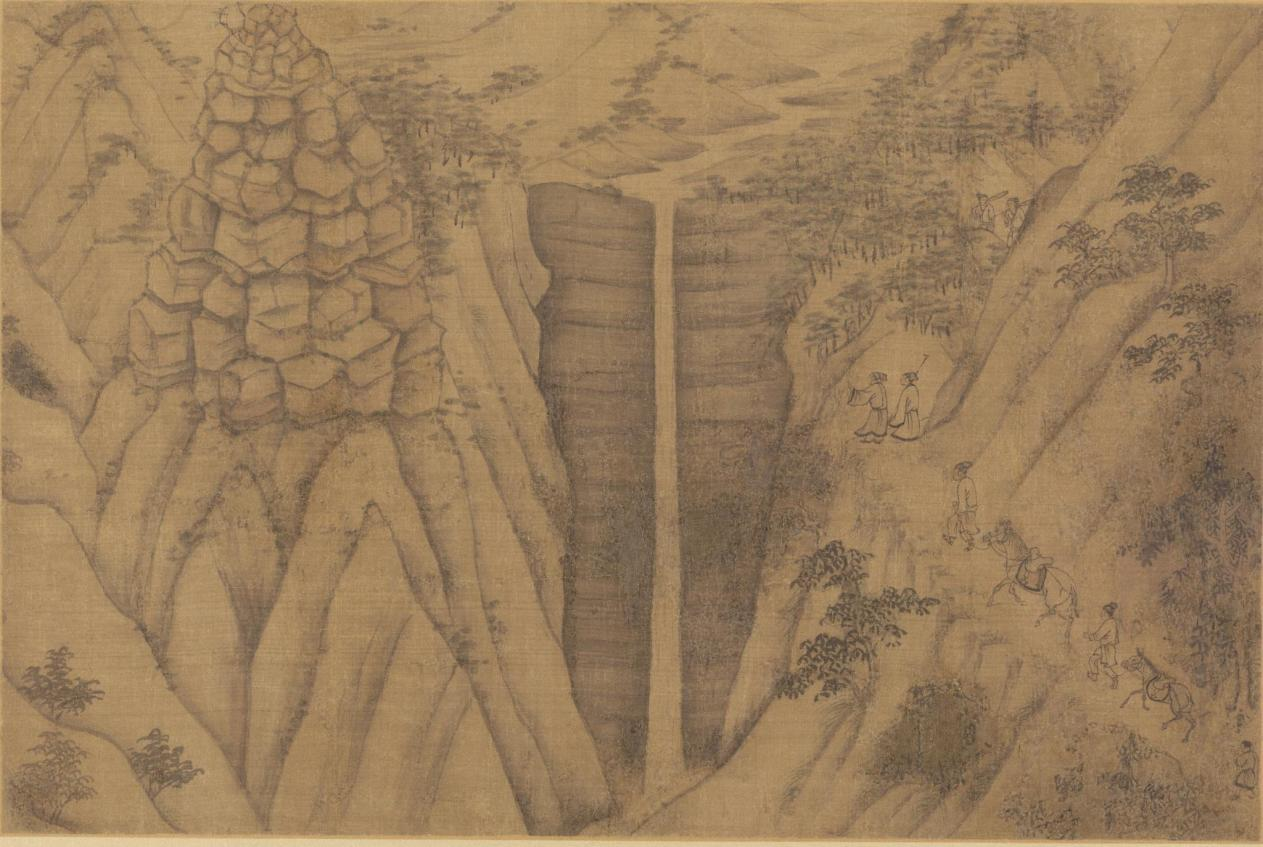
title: Dwelling in the Longmian ("Sleeping Dragon") Mountains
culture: China, Song dynasty (960-1279) - Yuan dynasty (1271-1368)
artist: follower of Li Gonglin (Chinese, c. 1049–1106)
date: 1100s-1200s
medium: handscroll mounted as an album leaf; ink and color on silk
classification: Painting